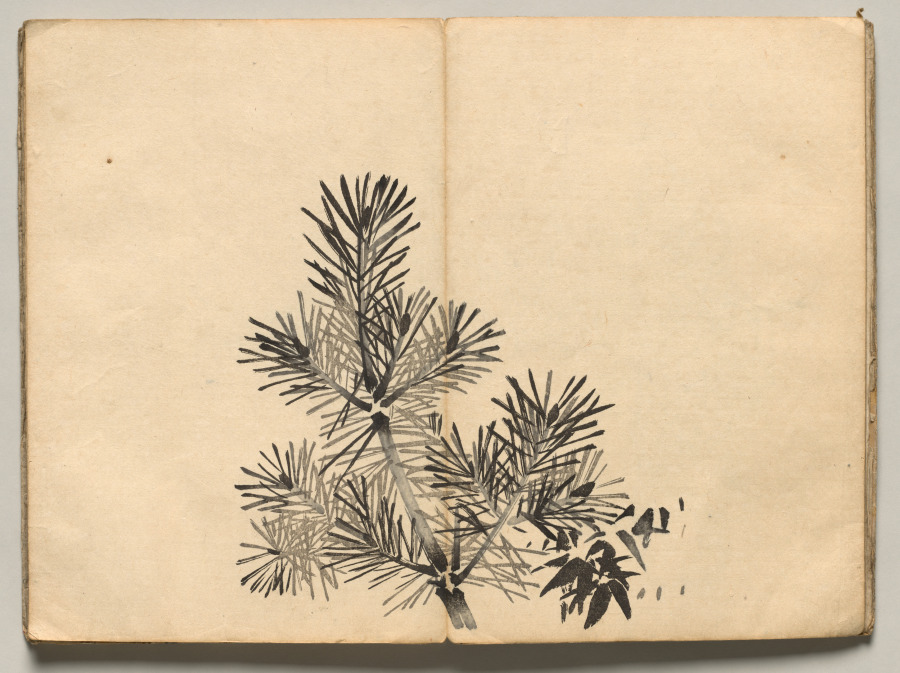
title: Young Pine from Ōkyo Picture Book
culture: Japan, Edo period (1615–1868)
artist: after Maruyama Ōkyo (Japanese, 1733–1795)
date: 1850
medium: accordion-style woodblock printed folding-book; ink and color on paper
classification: Bound Volume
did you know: This impression of a book of woodblock-printed designs is missing a spread that depicts a crane.